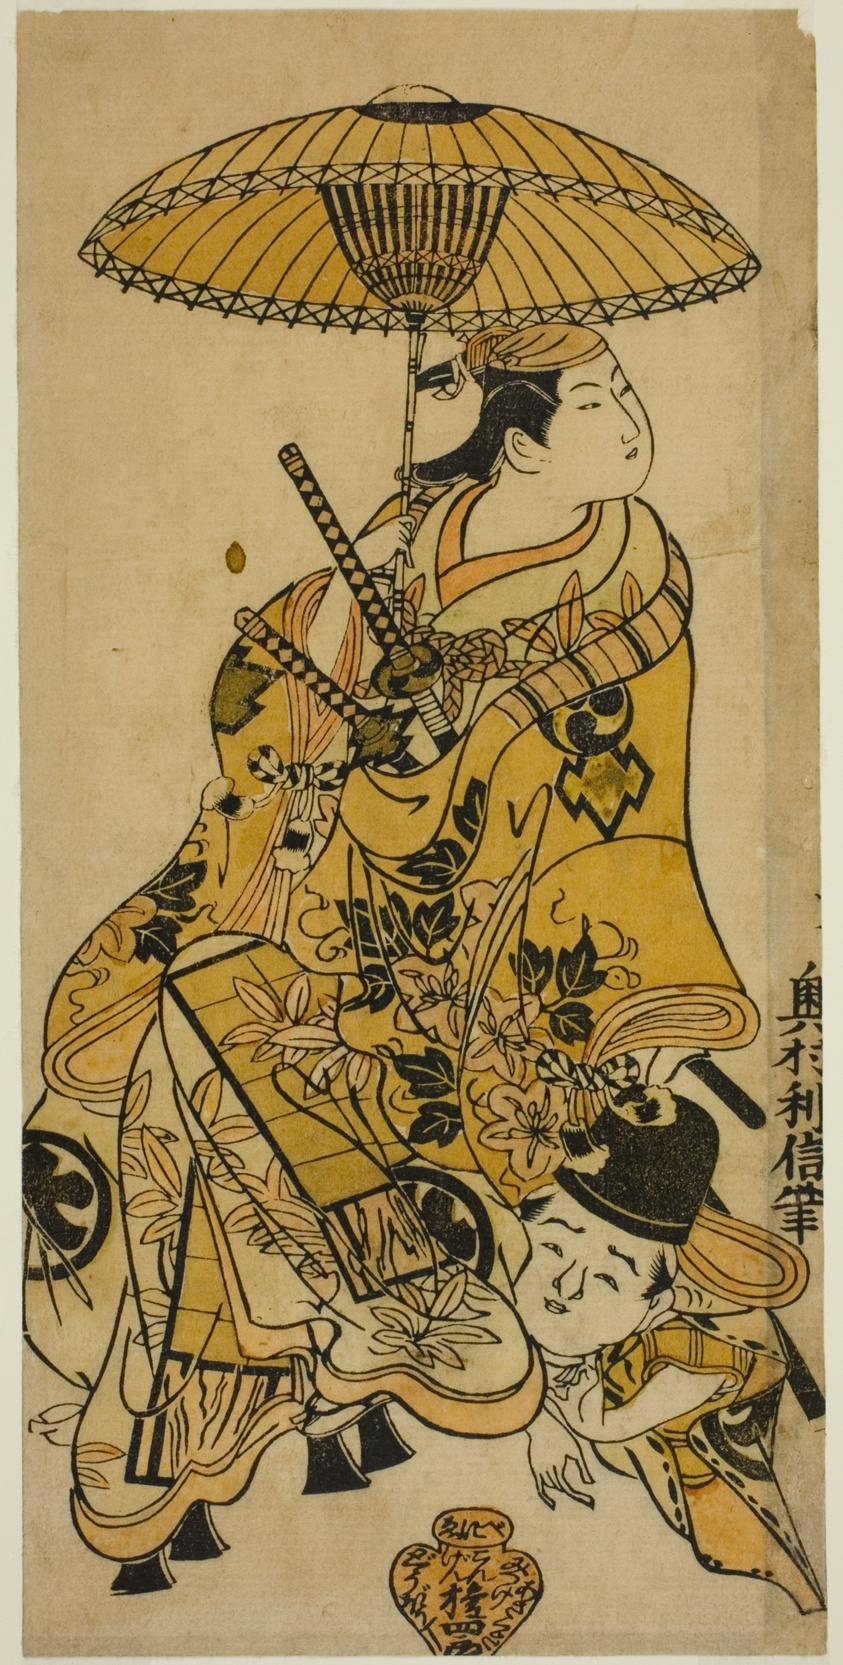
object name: Print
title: The Actors Nakamura Takesaburo as Shikishi Naishinno and Tsuruya Nanboku as Gengoro in the play "Tategami Teika Kazura," performed at the Ichimura Theater in the eleventh month, 1719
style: Japanese (culture or style)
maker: Okumura Toshinobu (Japanese, active c. 1717-50)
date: 1719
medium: Hand-colored woodblock print; hosoban, urushi-e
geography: Japan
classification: woodblock print; print; asian art